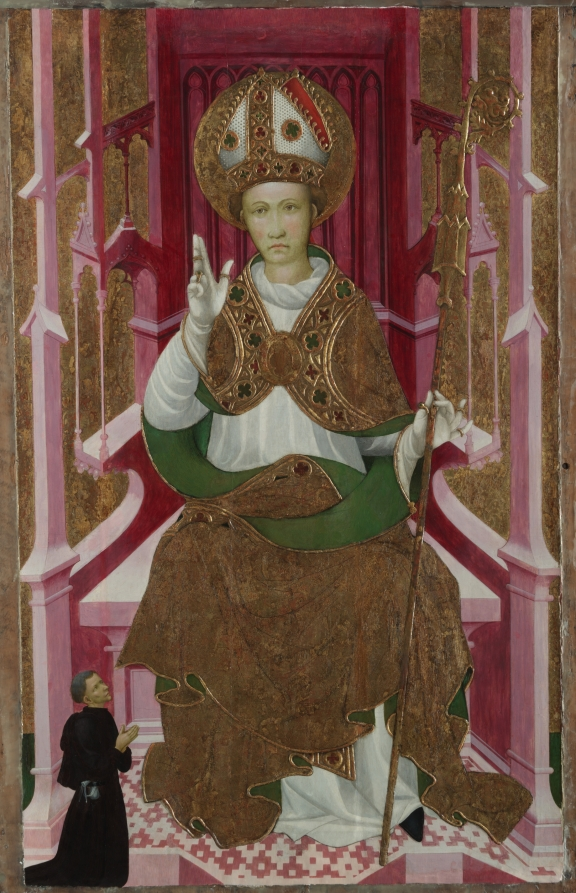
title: A Bishop Saint with a Donor (Saint Louis of Toulouse?)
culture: Spain, Catalonia, early 15th century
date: early 1400s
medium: tempera with raised and gilded gesso on wood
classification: Painting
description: The style of this painting suggests that it comes from Catalonia in northeastern Spain, though the identity of its artist remains unknown. The painting represents a youthful bishop-saint identifiable by a bishop’s symbols of authority, his miter and crozier. He wears rich vestments. Below, the figure in black represents the donor of the painting—likely a wealthy layperson rather than a cleric. The identity of the saintly bishop is speculated to be Saint Louis, Bishop of Toulouse, on the basis of his youth. Louis was consecrated Bishop of Toulouse in 1297, died six months later at the age of 23, and was canonized in 1317. His relics were moved in 1423 to Valencia and his cult flourished in Spain.